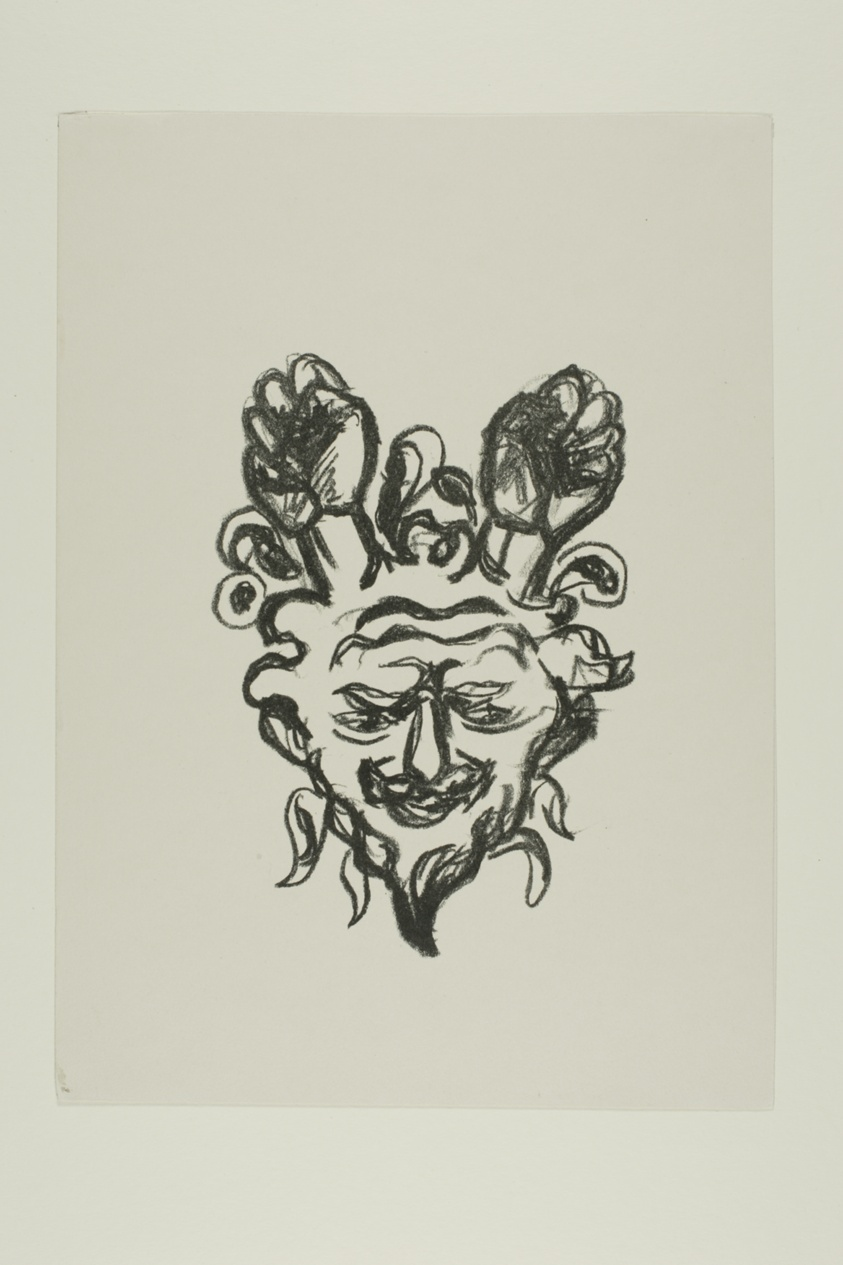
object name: Print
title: Vignette: Satyr's Head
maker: Edvard Munch (Norwegian, 1863-1944)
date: 1908/09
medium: Lithograph on paper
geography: Norway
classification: lithograph; print; prints and drawing